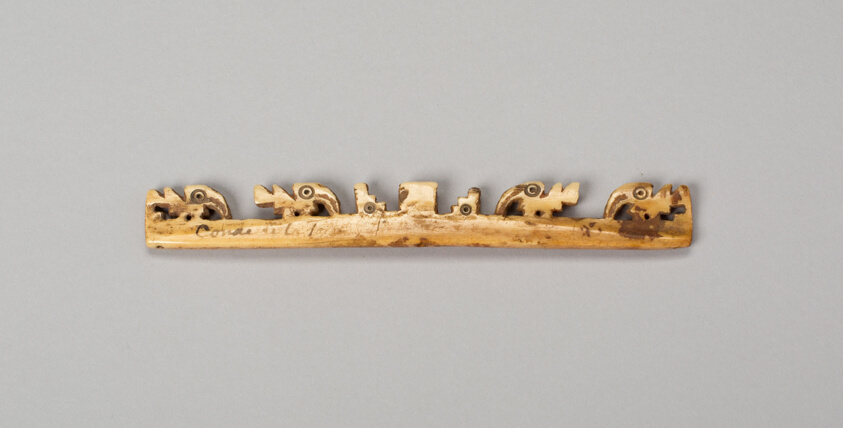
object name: Decorative Arts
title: Balance-Beam Scale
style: nazca, early intermediate period, Pre-Columbian, americas, Arts of the Americas, andean, andes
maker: Possibly Nazca; South coast, Peru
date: 500–800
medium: Bone with pigment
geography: Peru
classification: bone; american decorative arts; tool; decorative arts; art of the americas